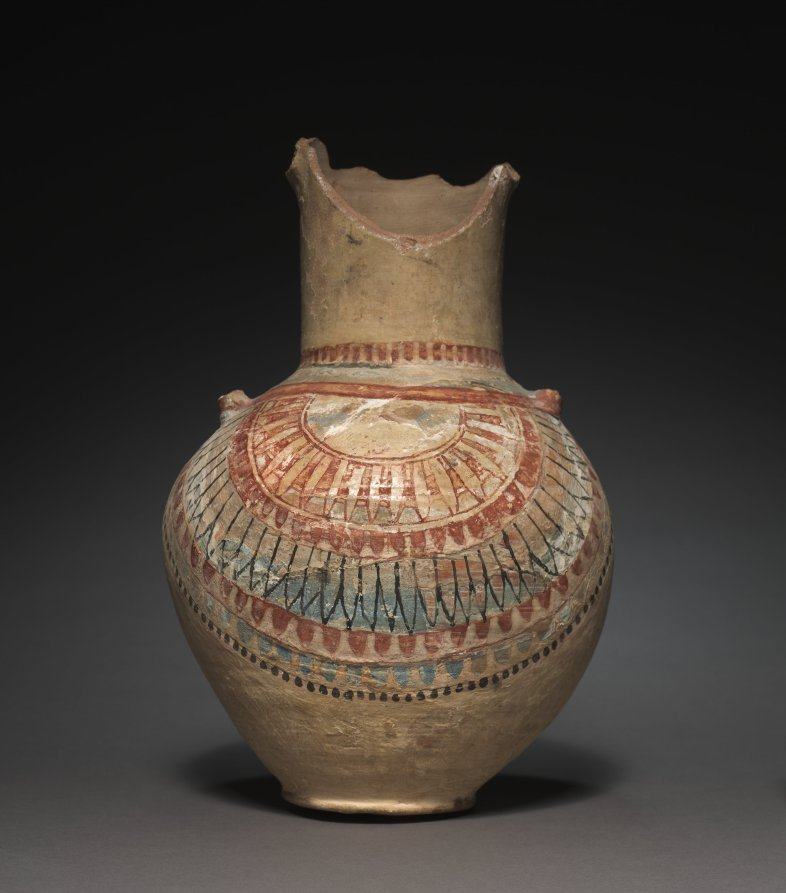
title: Decorated Amphora with Ibex Head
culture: Egypt, Modern pastiche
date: before 1920 this is common era, not BCE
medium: marl clay ware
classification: Vessels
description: A splendid example of the decorated pottery known as "palace ware," made only in Dynasty XVIII. It is painted with garlands imitating the real flowers with which vessels were draped at banquets. This vase was found in the palace of Amenhotep III at southern Thebes.